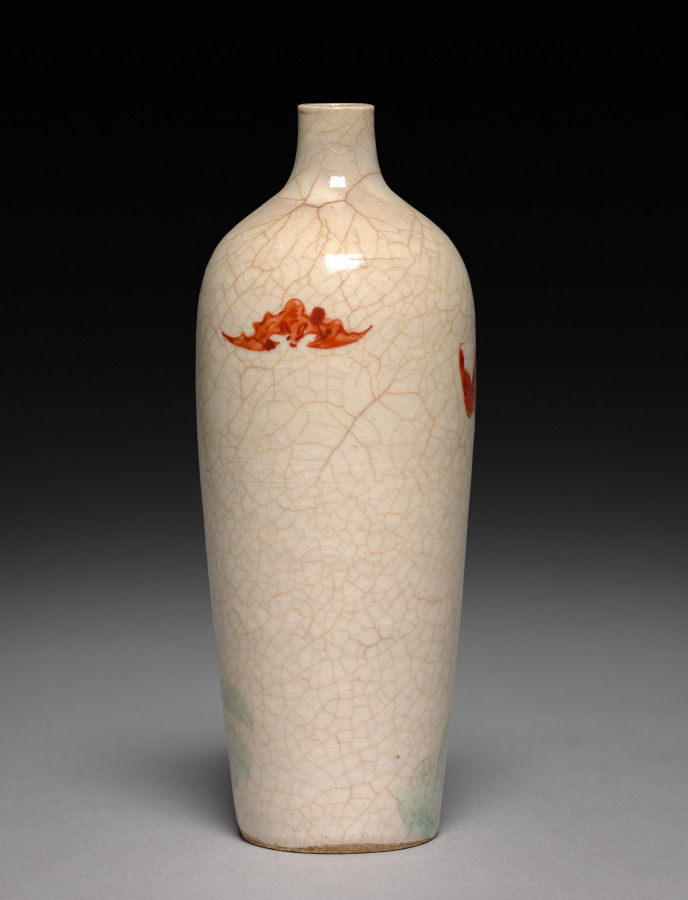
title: Snuff Bottle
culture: China, Qing dynasty (1644–1911), Qianlong reign (1736–95)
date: 1736–95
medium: porcelain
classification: Ceramic